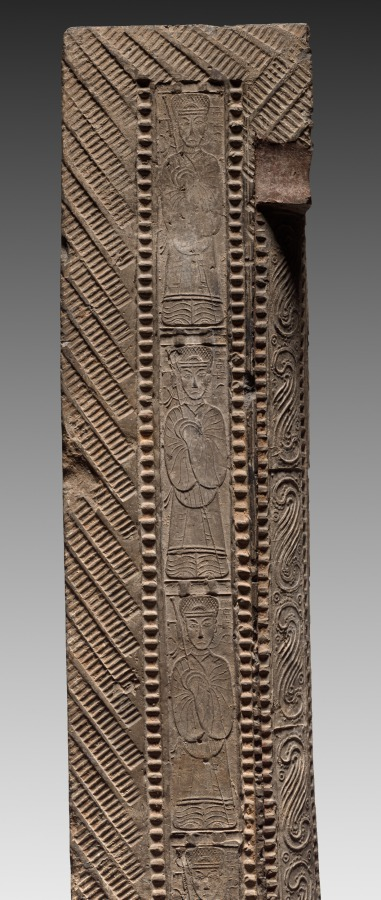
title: Hollow Tile: Column from Tomb-Chamber Doorway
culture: China, Han dynasty (202 BCE–220 CE)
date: 100–200 CE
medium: earthenware, die-stamped relief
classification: Ceramic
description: Striding tigers (top), racing horsemen (right column), and reverent officials (left column) are stamped into the surface of this underground portal to a tomb. The doorway preserves in stone the post-and-lintel structure, a basic element of Chinese wooden architecture. By the first century AD, a revolution in Chinese tomb construction and furnishing had taken place. Tombs lined with decorated bricks and tiles replace the earlier tombs constructed with only rammed earth-walls. Ceramic surrogates or models of stoves, houses, servants, and pets filled these more durable chambers, symbolically extending the creature comforts of this world into the world after death.